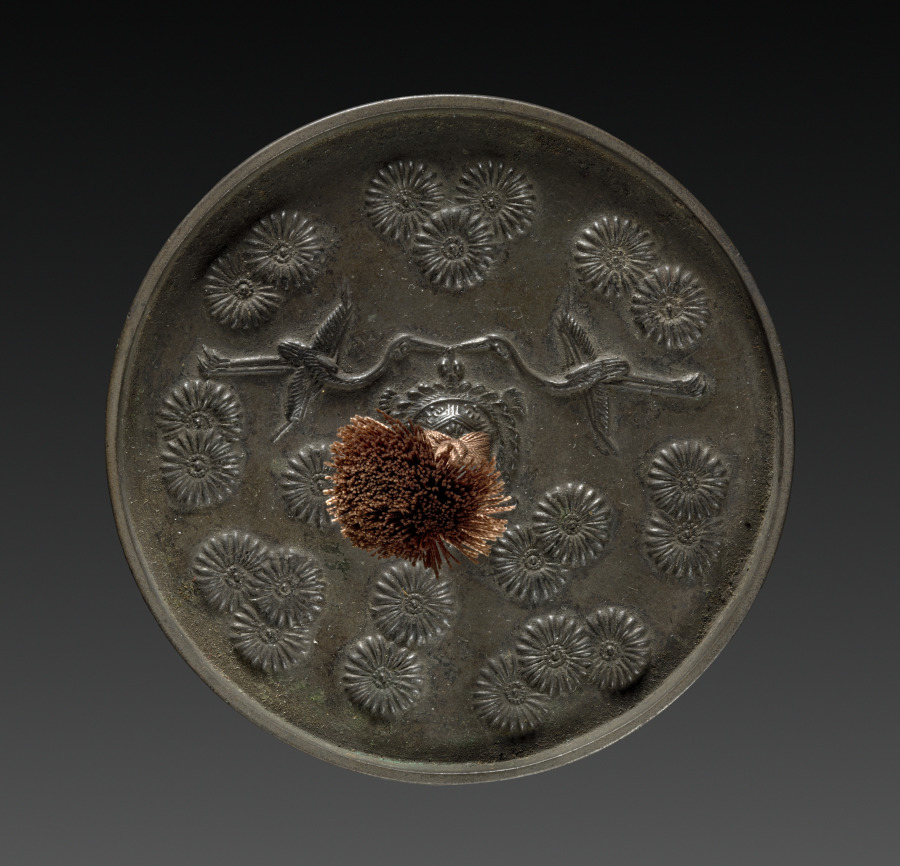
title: Mirror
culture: Japan, Muromachi period (1392–1573)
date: 1392–1573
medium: bronze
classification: Metalwork